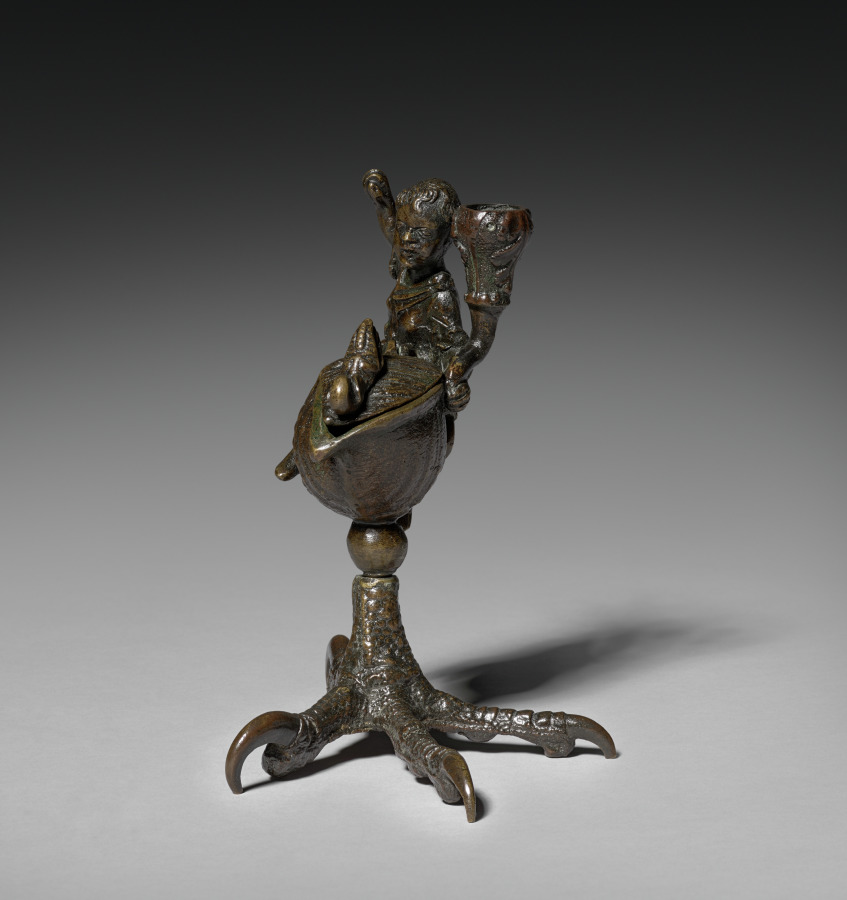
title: Inkwell and Candlestick with the Infant Hercules Killing the Serpents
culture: Italy, Ravenna, 16th century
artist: workshop of Severo da Ravenna (Italian, c.1496–c.1543)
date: c. 1510–20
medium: bronze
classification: Sculpture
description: In the early 1500s, Padua, a center of strong humanist traditions, encouraged the revival of classicism, and artists took their cues from descriptions in the works of classical authors. Classical small-scale bronzes grew in demand, and in response, the city's bourgeoning foundries produced a varied and extensive supply of small statues. Like many early Paduan bronzes, this work's utilitarian function—used to hold ink and to supply light—is complimented by its ornamental value. The base consists of an eagle claw, cast from life, supporting an equally realistic nautilus shell. Though medieval artists had occasionally used seashells to hold paints, the shell inkwell, whose small size makes it rather impractical to use, was a motif particular to Padua. Perched upon the shell is most likely Hercules, the son of Zeus. Perhaps aided by a staff (now missing) he is poised to strike a serpent, which according to myth was sent by Hera, the jealous wife of Zeus, to kill him. The dramatic opposition of hero and monster enhances the connection to the classical past, further meeting the desires of the educated patrons of Padua.